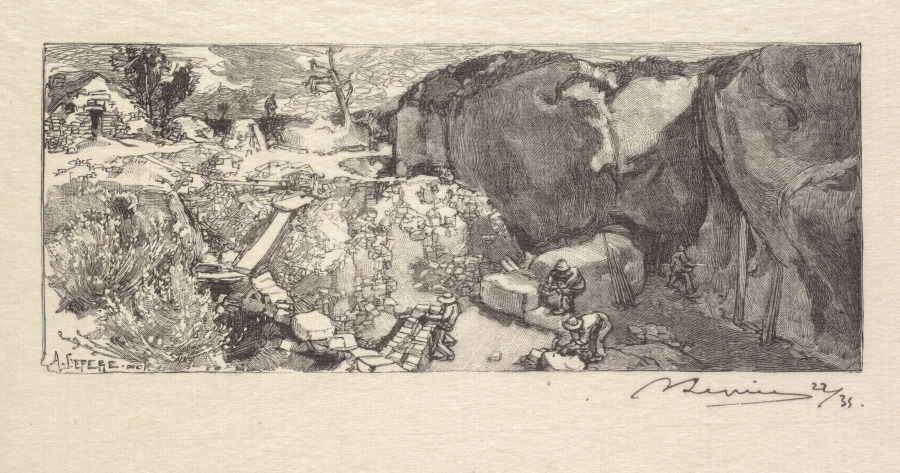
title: Fontainebleau Forest: Sandstone Quarry (La Forêt de Fontainebleau: La Carrièrre de Grès)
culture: France, 19th century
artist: Auguste Louis Lepère (French, 1849–1918)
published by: A. Desmoulins, Published in Revue Illustrée, 1887–90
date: 1890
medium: wood engraving from bound volume of 34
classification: Bound Volume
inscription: In block, lower left: A. LEPERE del.; below image, lower right, in black ink: ALepère 22/35; on window mat, lower right, in graphite: Carrièrre de grès